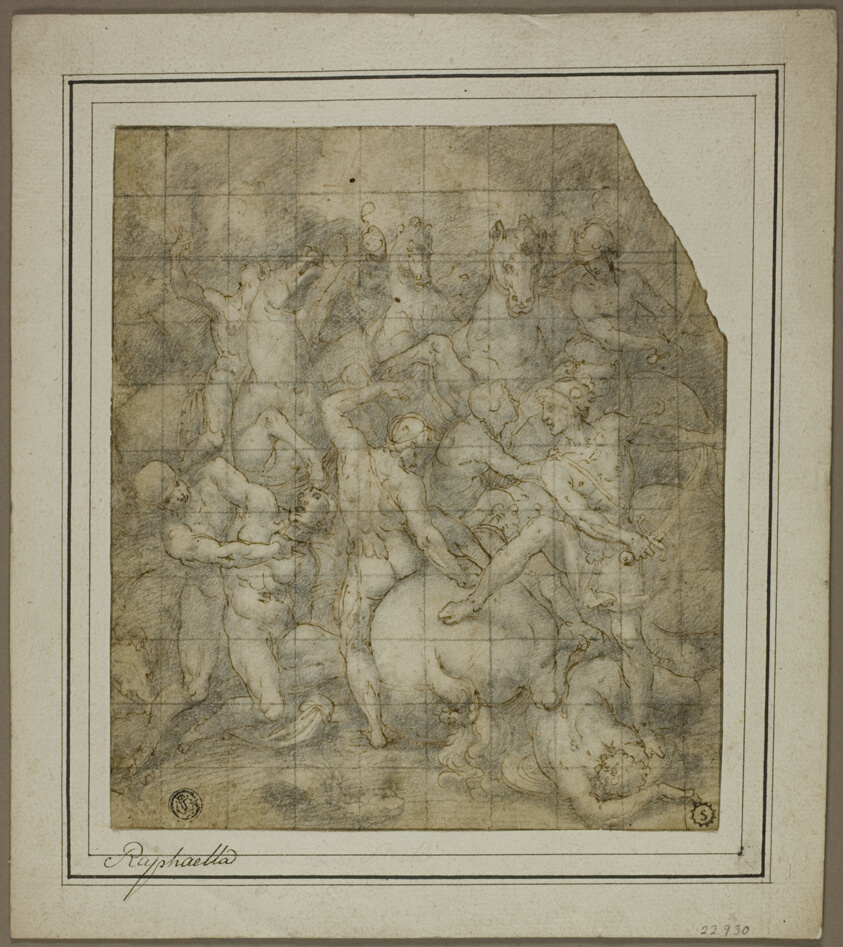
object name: Drawing and Watercolor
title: Battle Scene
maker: Giovanni Balducci, called il Cosci; Italian, c. 1560-1631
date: c. 1589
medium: Pen and brown ink and black chalk, on ivory laid paper, squared in black chalk, laid down on ivory laid paper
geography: Florence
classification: pen and ink drawings; drawings (visual works); prints and drawing